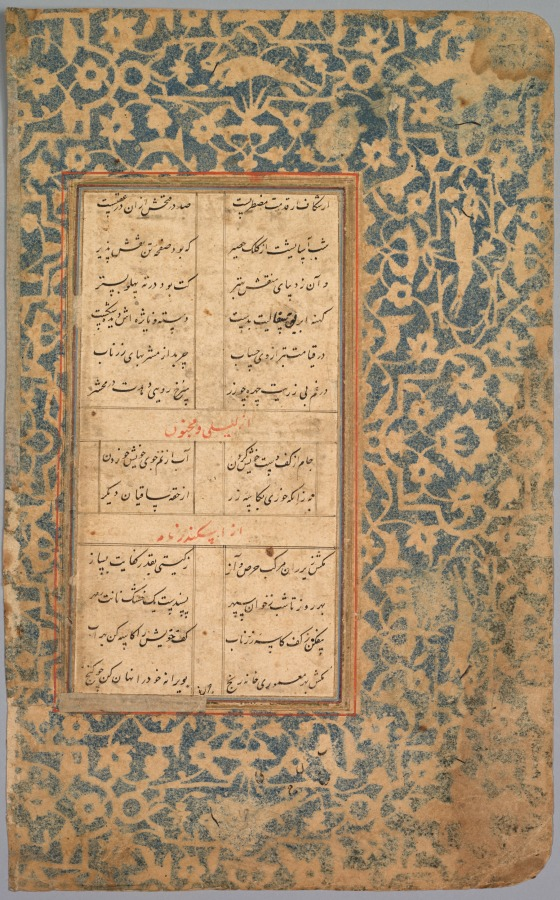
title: School Exercise Alphabet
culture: India, Mughal Dynasty (1526-1756)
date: 18th century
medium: ink on paper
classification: Manuscript